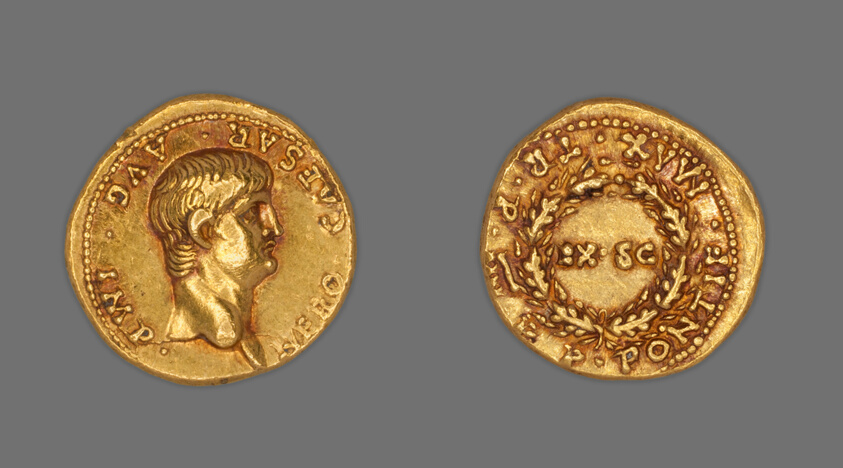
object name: Coin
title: Aureus (Coin) Portraying Emperor Nero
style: imperial (roman), ancient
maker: Roman, minted in Rome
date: December 57-December 58, issued by Nero (emperor)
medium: Gold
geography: Rome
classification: coin; ancient art